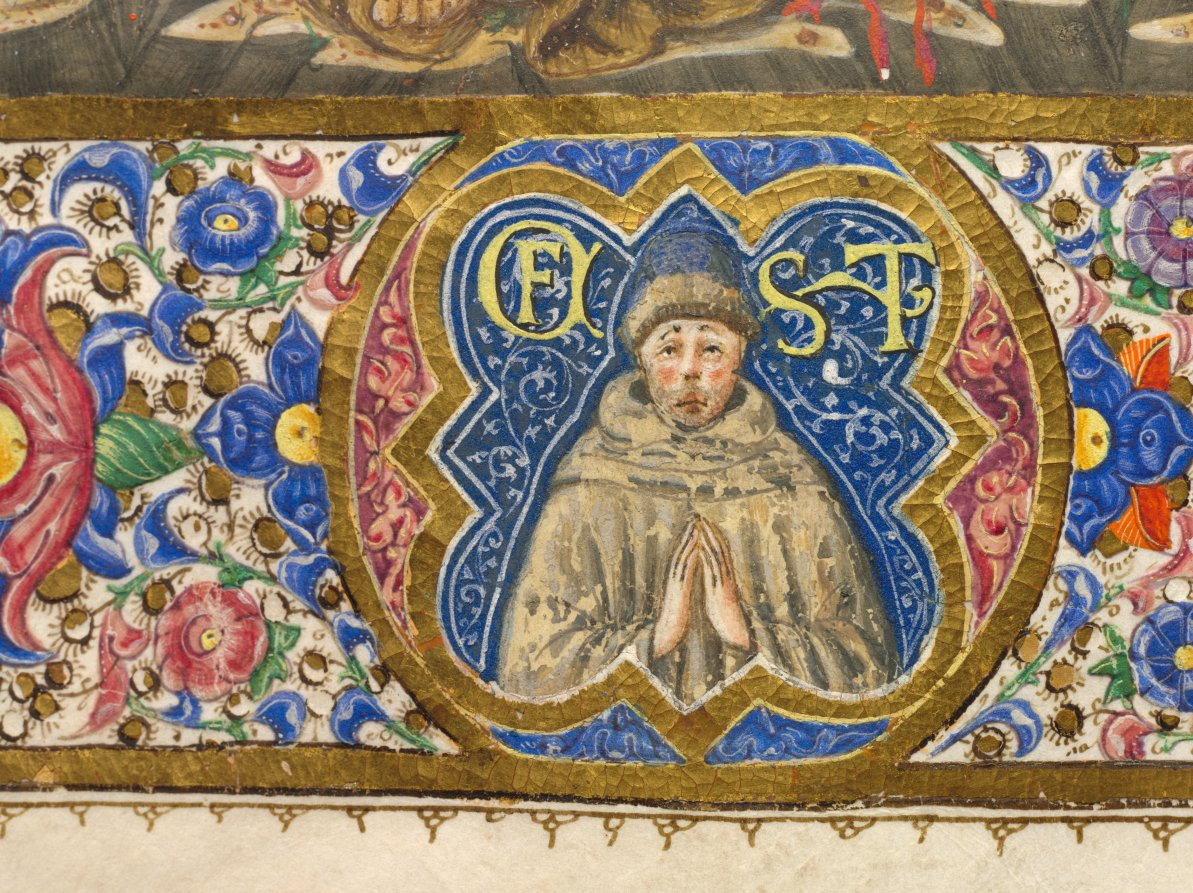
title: Missale: Fol. 185v: Crucifixion with borders (full page)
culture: Italy, Perugia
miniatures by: Bartolommeo Caporali (Italian, c. 1420–1503)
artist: assisted by Giapeco Caporali (Italian, d. 1478)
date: 1469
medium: ink, tempera and burnished gold on vellum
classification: Bound Volume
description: This illuminated manuscript once served as a liturgical service book used on the high altar by a priest for the Mass. The missal’s colophon (inscription) identifies the book as belonging to the church of San Francesco in Montone, a convent of Franciscan friars, and gives its date of completion as October 4, 1469. Here, the volume is opened to its masterpiece, two pages that introduce the canon of the Mass, the most solemn part of the celebration during which the priest consecrates the Eucharistic bread and wine. The missal receives its name from the two Perugian artists who collaborated to illuminate its pages. Here, the Calvary scene featuring the crucified Christ flanked by the Virgin and Saint John is the work of Bartolomeo Caporali, and the marginal decoration and the facing page are likely the work of his brother, Giapeco. Saint Francis’s appearance at the foot of the cross attests to the missal’s Franciscan use and affiliation.